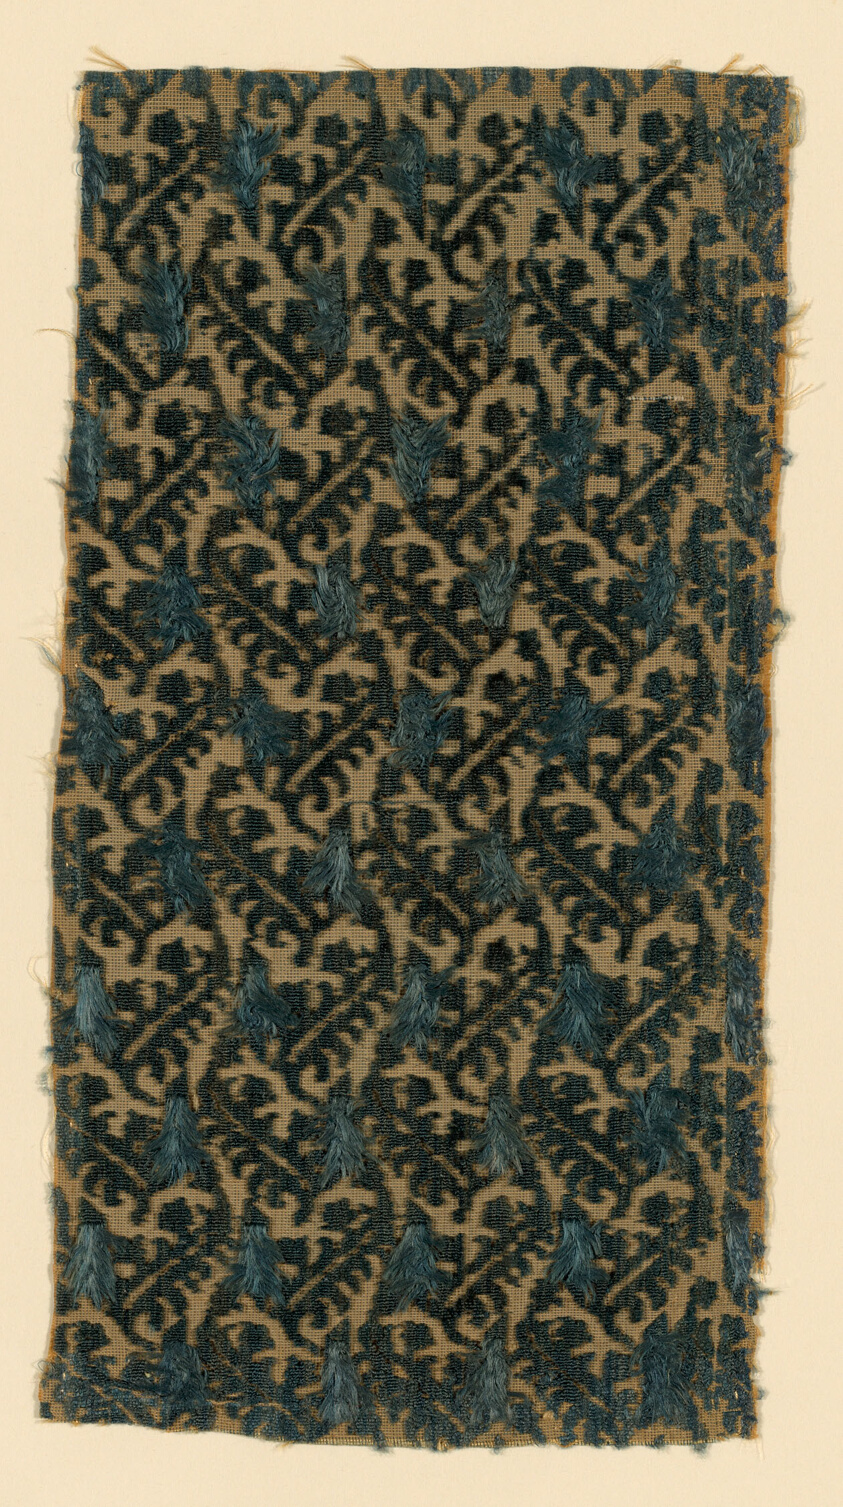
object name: Textile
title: Fragment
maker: Italy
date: 1601/35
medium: Silk, plain weave with supplementary pile warps forming cut, uncut, and voided velvet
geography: Italy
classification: weaving - velvet; weaving; textile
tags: geometric motif